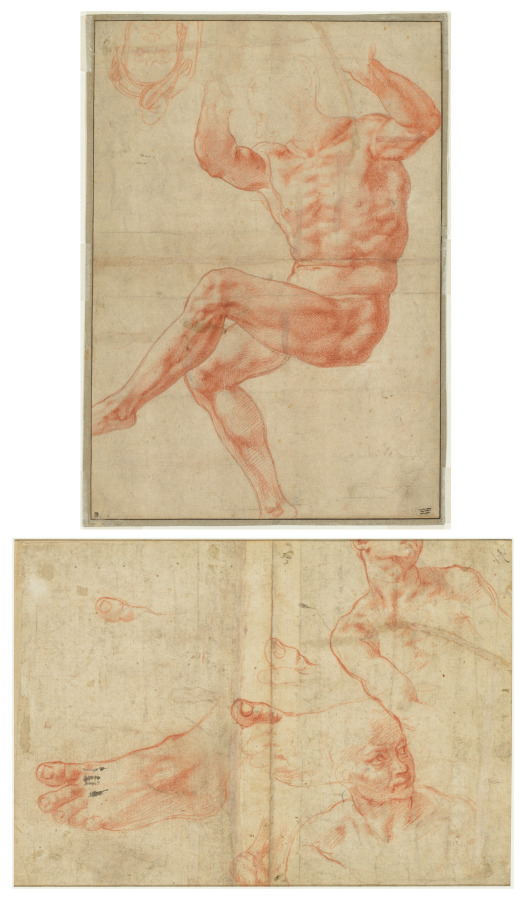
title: Study for the Nude Youth over the Prophet Daniel (recto); Figure Studies for the Sistine Ceiling (verso)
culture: Italy, 16th century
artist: Michelangelo Buonarroti (Italian, 1475–1564)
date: 1510–11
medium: red chalk over black chalk or charcoal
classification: Drawing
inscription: recto: lower right, in brown ink: 55 [crossed out] verso: upper center, in brown ink: [Jr?]; upper right, in brown ink: V./.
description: Universally considered one of the greatest artists of the Italian Renaissance, Michelangelo devoted four years to painting the vast ceiling fresco in the Sistine Chapel. This preparatory study portrays one of the 20 athletic male nudes, known as ignudi, who serve as supporting figures at each corner of the Old Testament scenes painted down the center of the ceiling. Michelangelo worked out the positioning of the ignudi in red chalk drawings before beginning to paint each section of wet plaster. The energy and monumentality of the figure in red chalk, whose body extends beyond the sheet, suggests the heroic athleticism of Michelangelo’s sculpture.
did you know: When Michelangelo ran out of room for the figure's left foot, he turned the paper over and drew the foot in detail along with three additional sketches of the big toe.